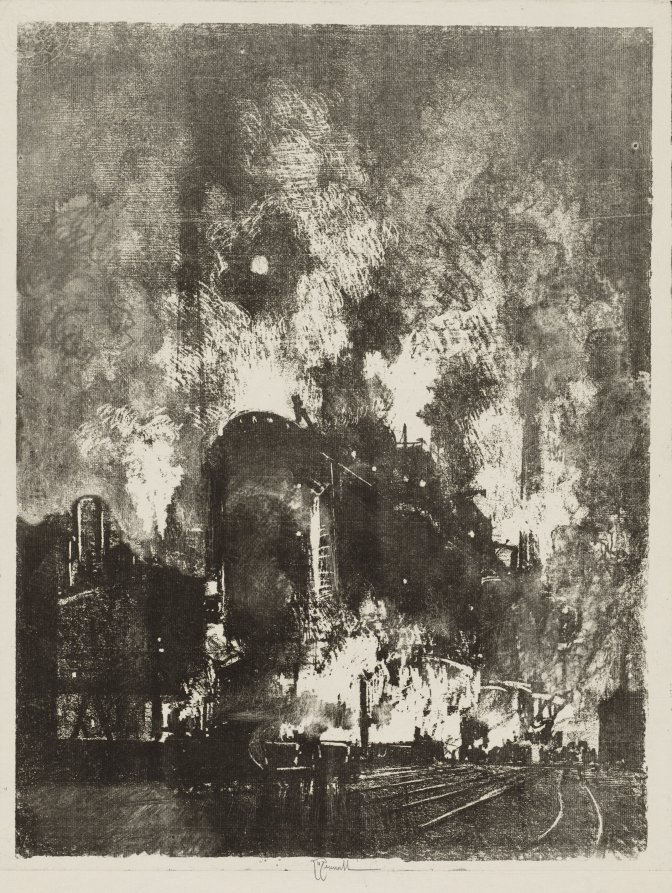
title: English War Work: Furnaces at Night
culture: America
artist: Joseph Pennell (American, 1857–1926)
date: 1916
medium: lithograph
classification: Print